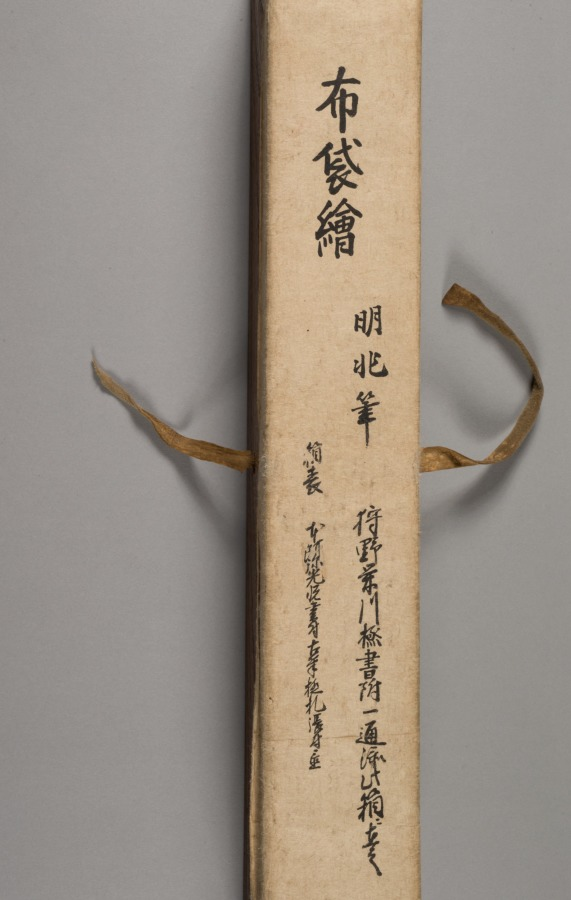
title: Hotei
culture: Japan, Muromachi period (1392–1573)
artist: Kichizan Minchō (Japanese, 1352–1431)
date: late 1300s–early 1400s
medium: hanging scroll; ink and slight color on paper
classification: Painting